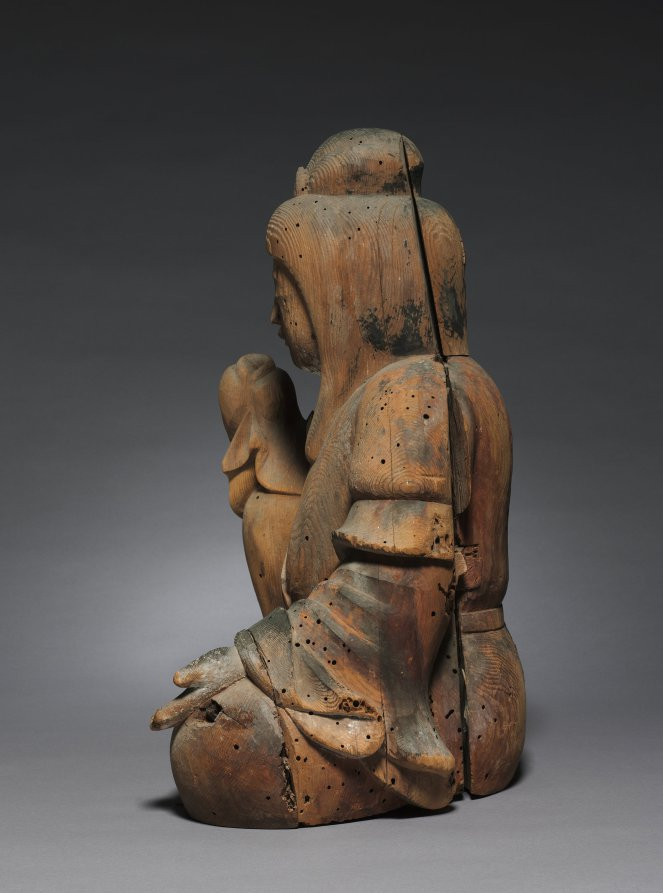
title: Shinto Deity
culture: Japan, Heian period (794–1185)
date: 900s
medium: wood, with traces of polychromy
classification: Sculpture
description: This sculpture represents a kami, the name for deities associated with the Japanese religious tradition called Shinto. It is said to have originally been created for the Usa Hachiman Shrine in Oita on the island of Kyushu. The shrine houses four main kami: Hime Okami, who assists those engaged in agriculture andsea travel; the legendary 5th-century emperor Ojin deified as the kami Hachiman; Empress Jingu; and the kami of Mount Kawara, who aids copper miners. The pose of this figure, dressed in robes reminiscent of a Tang dynasty court lady, suggests that she may have been an attending deity.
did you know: Traces of pigment on the surface of this sculpture indicate it was once painted.